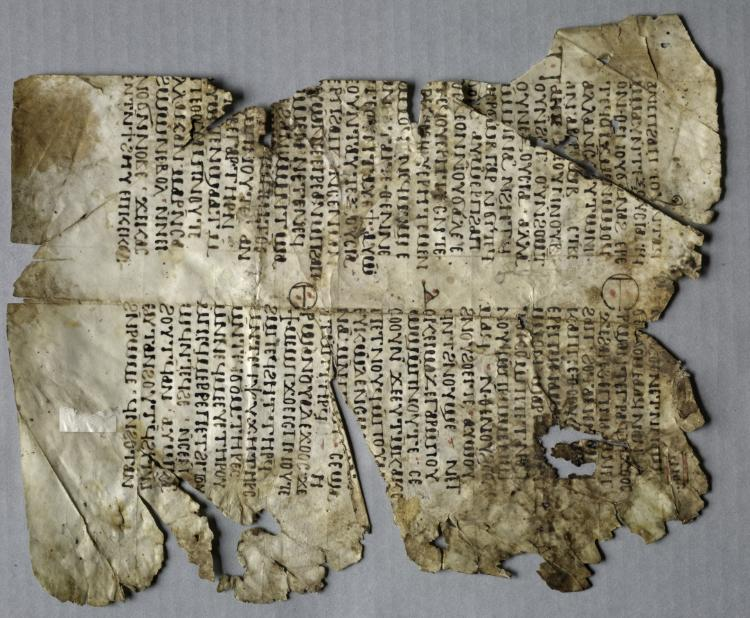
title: Leaf from a Christian Homily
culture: Egypt, Coptic period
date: 500s-600s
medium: ink on vellum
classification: Manuscript